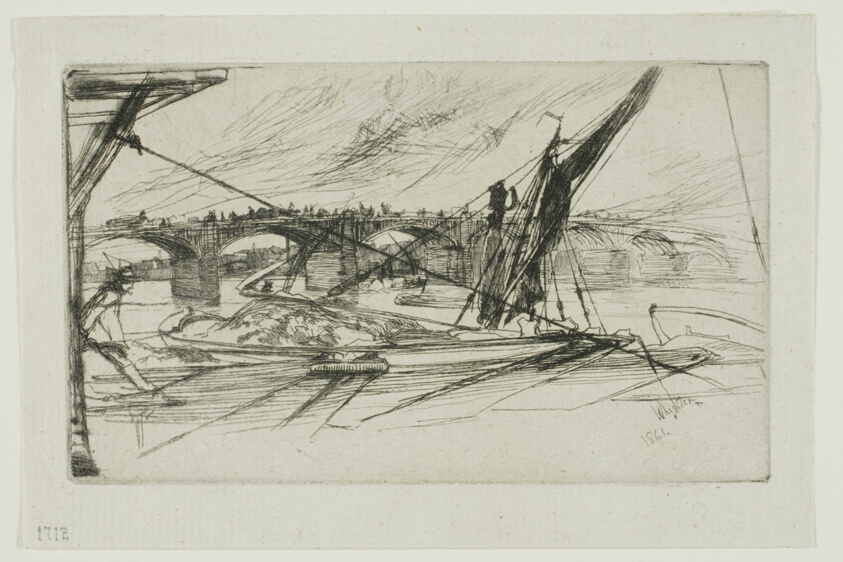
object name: Print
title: Vauxhall Bridge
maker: James McNeill Whistler (American, 1834-1903)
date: 1861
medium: Etching and drypoint in black ink on ivory laid paper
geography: United States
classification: etching; print; prints and drawing; paper; drypoint